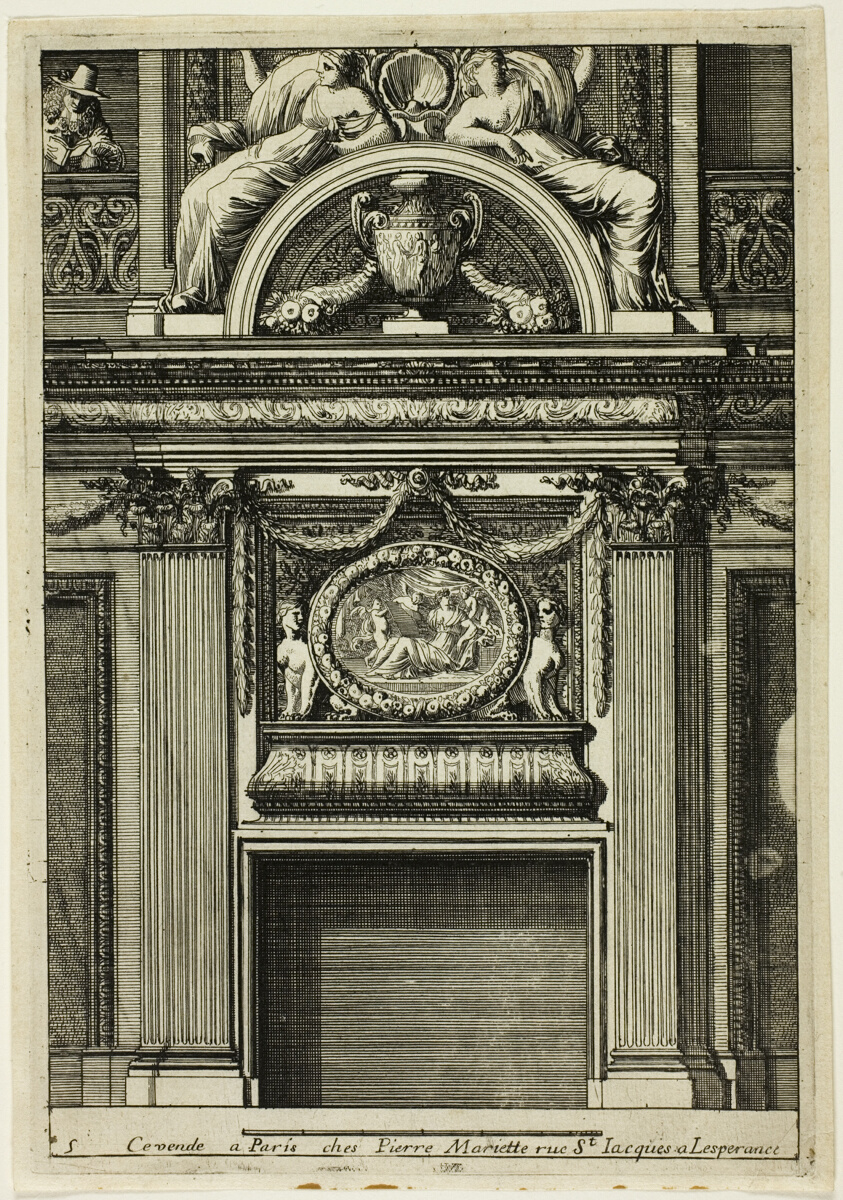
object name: Print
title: Chimneys in the Italian Manner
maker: Jean Le Pautre (French, 1618-1682)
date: c. 1665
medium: Etching on ivory laid paper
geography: France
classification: etching; print; prints and drawing